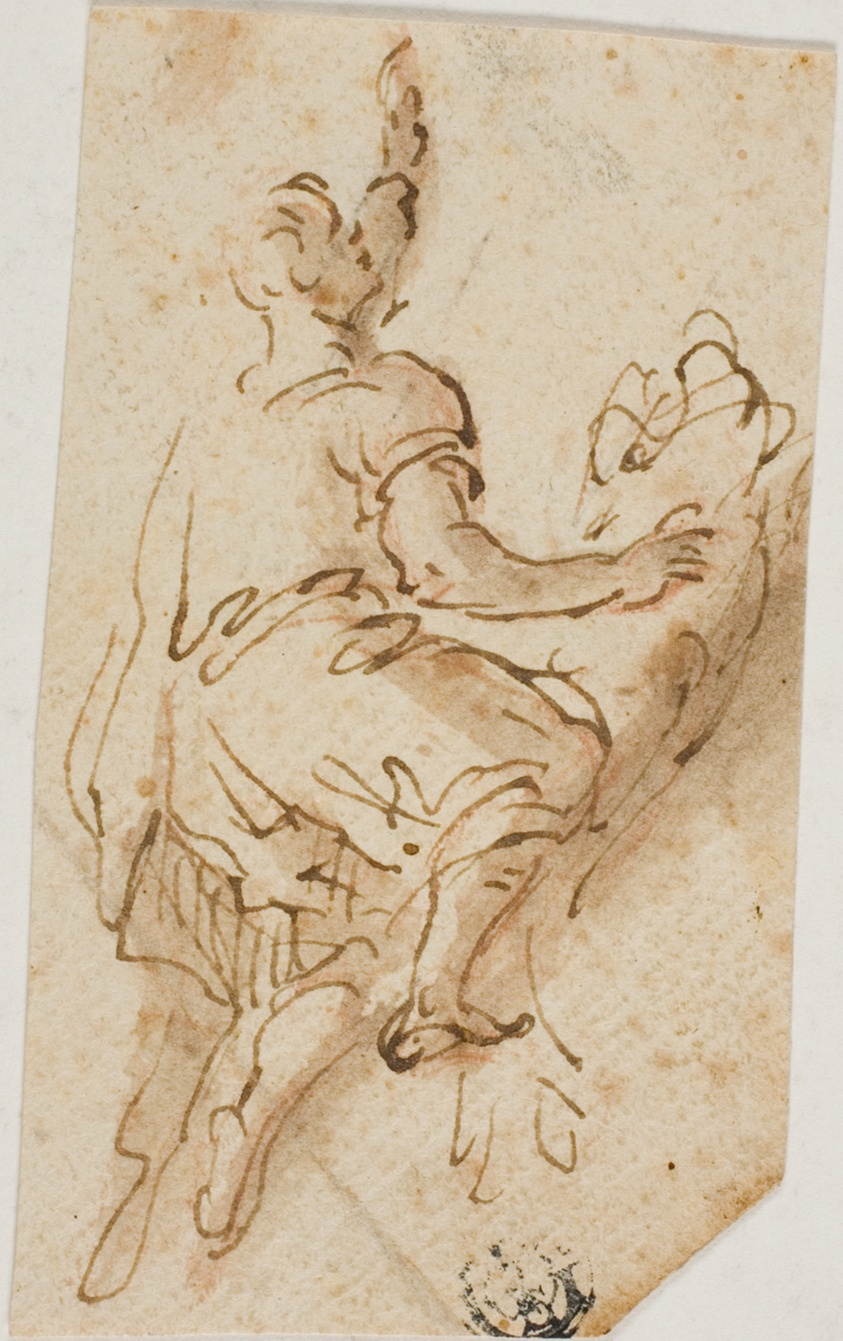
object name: Drawing and Watercolor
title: Man Mounting Lion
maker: Salvator Rosa (Italian, 1615-1673); or Pier Francesco Mola (Italian, 1612-1666)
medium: Pen and brown ink with brush and brown wash, over red chalk, on cream laid paper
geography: Italy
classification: pen and ink drawings; drawings (visual works); prints and drawing